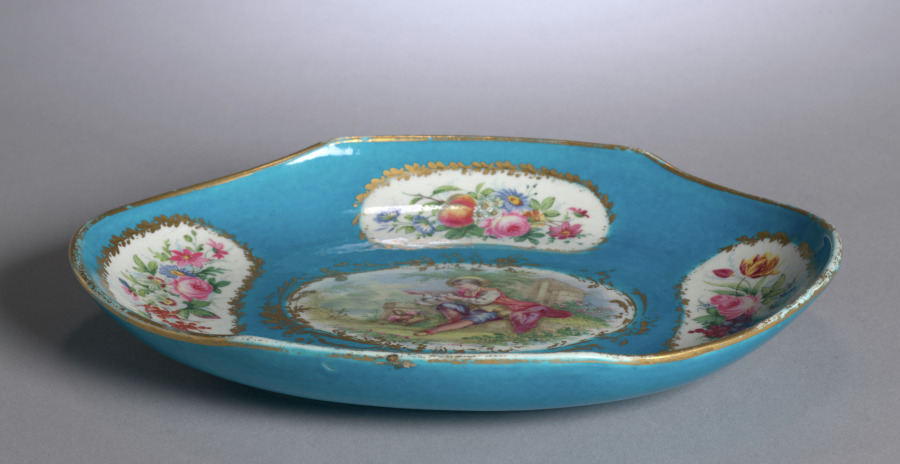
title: Dish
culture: France, Sèvres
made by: Sèvres Porcelain Factory (French, est. 1756)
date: 1800s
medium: porcelain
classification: Ceramic